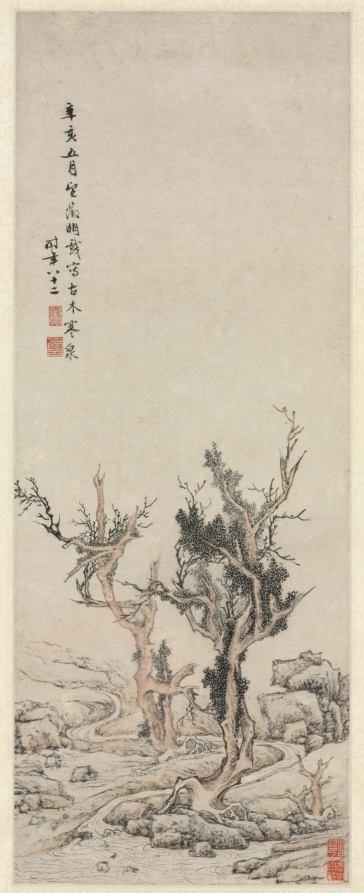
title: Old Trees by a Wintry Brook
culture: China, Ming dynasty (1368–1644)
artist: Wen Zhengming (Chinese, 1470–1559)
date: 1551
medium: hanging scroll, ink and light color on paper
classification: Painting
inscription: 辛亥五月望徵明戲寫古木寒泉 時年八十二 [印] 徵明; 停雲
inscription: 2 additional seals of Mou Yueqi 繆曰芑 (18th century).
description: Wen Zhengming was one of the most celebrated calligraphers and painters during the Ming dynasty (1368–1644). His inscription, gracefully written in small characters on the upper left corner, reveals Wen’s emotional mood at that moment of creation. "In the fifteenth day of the fifth month, the year of xinhai [1551], [I], Zhengming, playfully write this Old Trees by a Wintry Brook at eighty-two [sui]." How should we understand a wintery landscape painted in the middle of spring? Was it simply inspired by a surprisingly late spring snow? Or can it be that the “wintery” brook reflects the octogenarian’s feelings about aging and his inevitable, approaching mortality? The junipers’ gnarled forms are a poignant symbol of aging and suffering, yet the ink-dot leaves on some branches suggest that the trees are still alive, awaiting the warmth of spring.